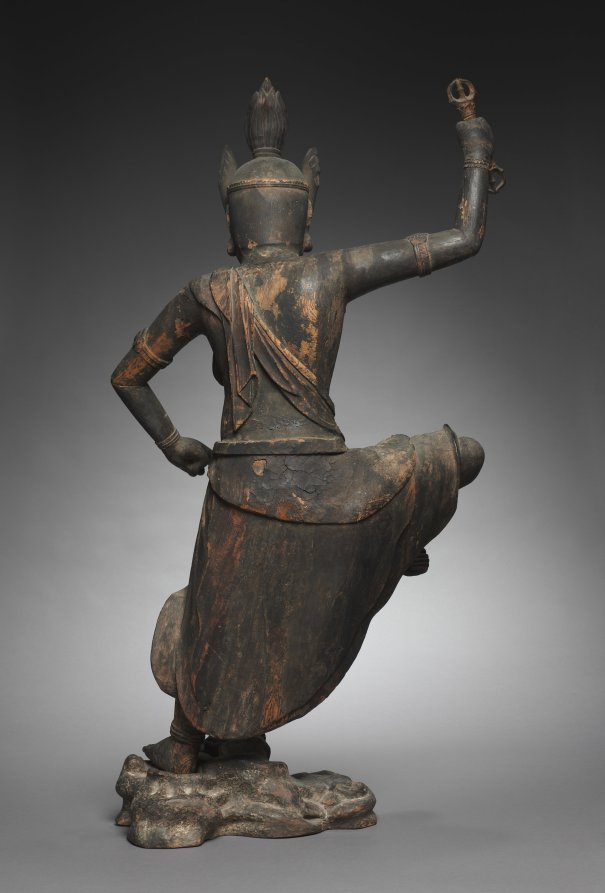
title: Zaō Gongen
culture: Japan, Kamakura period (1185–1333)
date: 1200s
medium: wood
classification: Sculpture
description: Zaō Gongen is the guardian deity of Mount Kinpu in Yoshino south of Nara. Zaō appeared at the behest of En no Gyōja, who prayed for a powerful protector of the mountain. The deity was described as a combined manifestation of the Buddha Shakyamuni, Thousand-Armed Kannon, and Miroku. These three deities were viewed as the past, present, and future protectors of the world. Zaō’s appearance derives from portrayals of fierce Buddhist deities.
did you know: Zaō Gongen wears the pelt of a large feline, the face of which is near his knee.